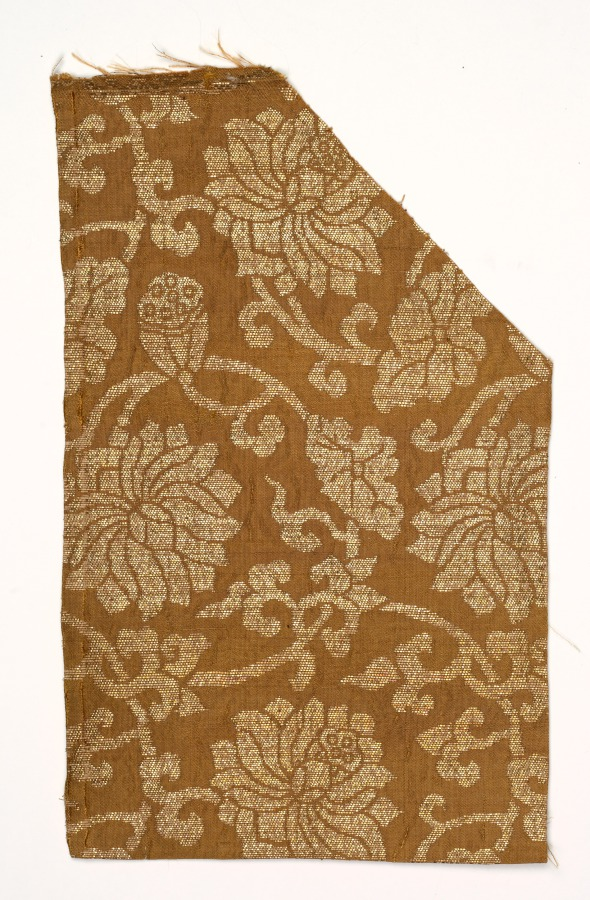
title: Textile Fragment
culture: Japan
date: 1700s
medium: silk, metallic thread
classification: Textile